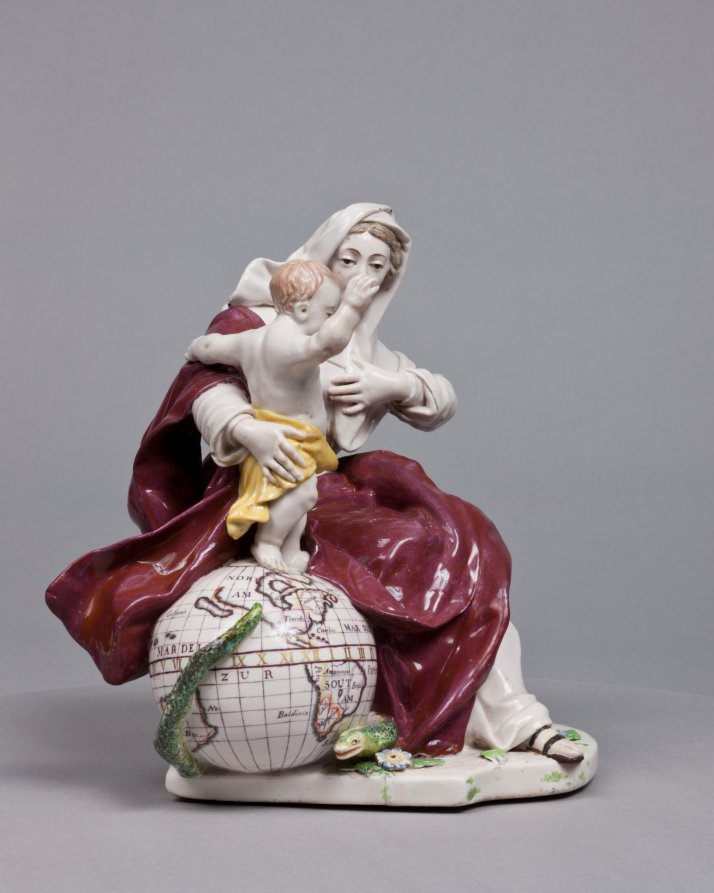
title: Madonna and Child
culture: England, Chelsea, 18th century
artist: Chelsea Porcelain Factory (Britain, London, 1745–84)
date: c. 1755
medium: porcelain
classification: Ceramic